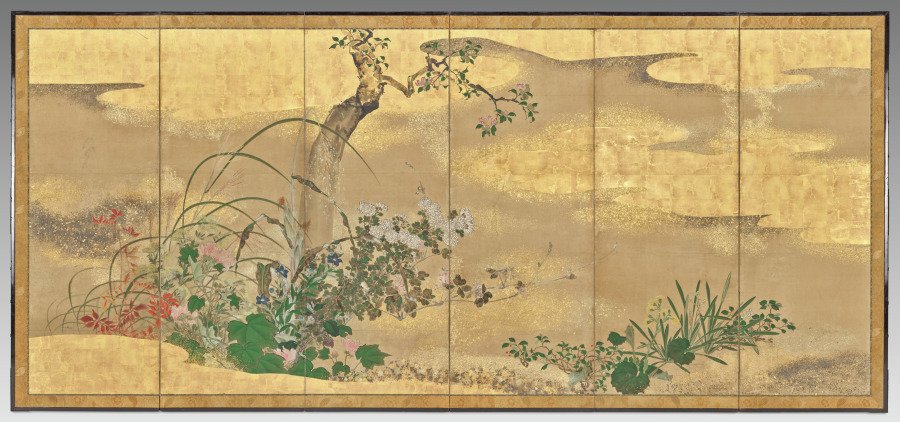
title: Flowers and Trees of the Four Seasons (left screen)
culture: Japan, Edo period (1615–1868)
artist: Watanabe Shikō (Japanese, 1683–1755)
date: early to mid-1700s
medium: Six-panel folding screen; ink, color, gold, silver, and gilding on paper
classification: Painting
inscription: 始興之印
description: The painter Watanabe Shikō had a special interest in scientific realism, based on interactions with his patron Konoe Iehiro. Shikō combined his attention to accurate depiction of plants with strong ink outlines and decorative elements like gold and silver, arriving at an innovative style that influenced many of his peers in the city of Kyoto.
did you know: One plant in these screens, tumeric, or ukon in Japanese, is found in Okinawa.